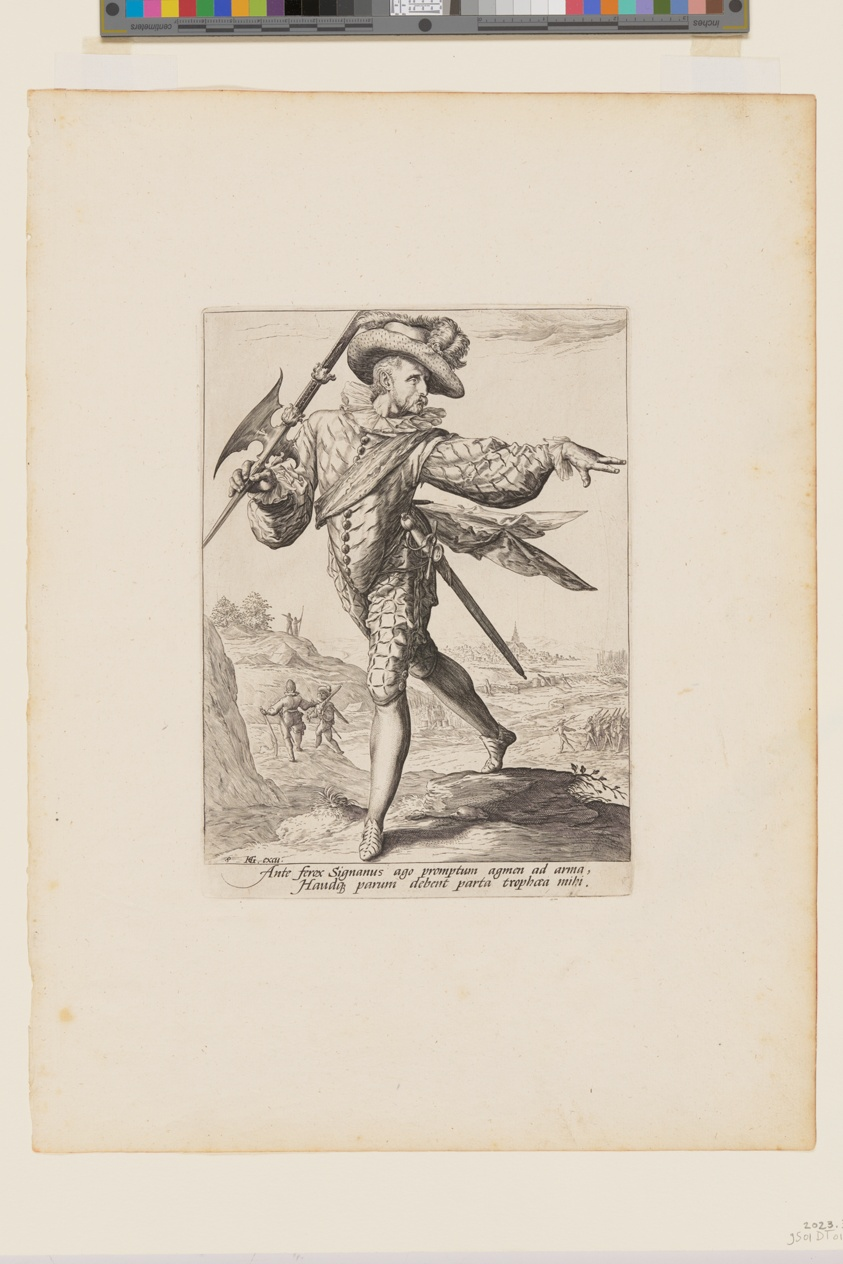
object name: Print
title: Sergeant, from Officers and Soldiers of the Bodyguard of Emperor Rudolph II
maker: Jacques de Gheyn II (Dutch, 1565–1629); after Hendrick Goltzius (Dutch, 1558–1617)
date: 1587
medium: Engraving on ivory laid paper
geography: Netherlands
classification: engraving; paper; print; prints and drawing